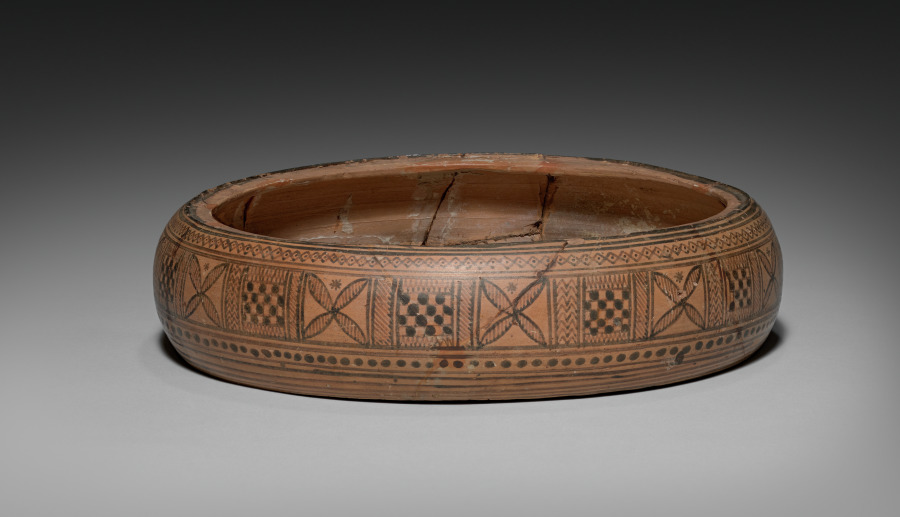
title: Geometric Horse Pyxis (Cylindrical Box)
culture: Greek, Attic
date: c. 760–750 BCE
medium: ceramic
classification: Ceramic